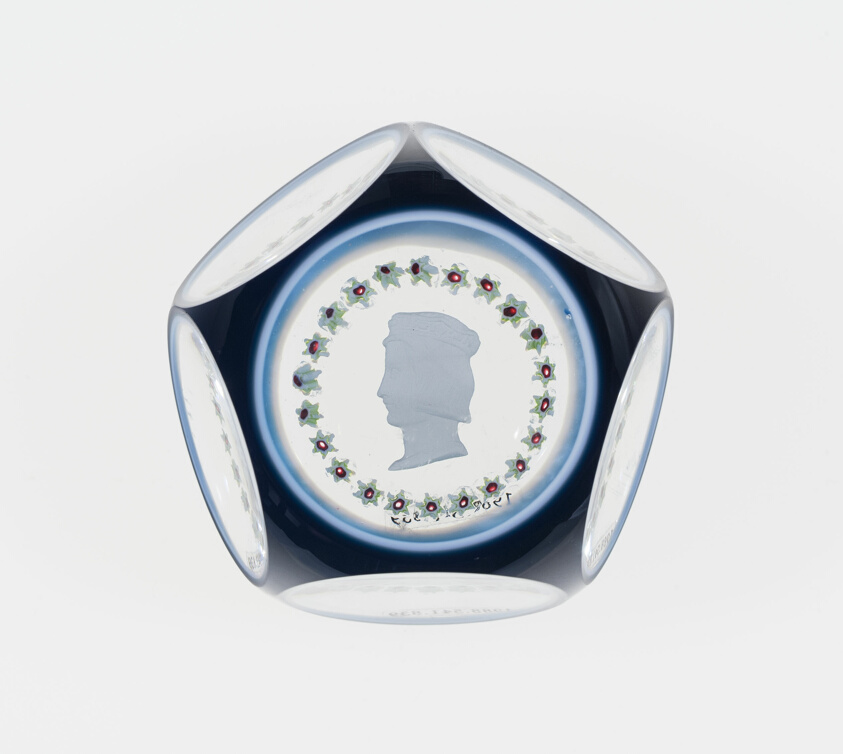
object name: Glass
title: Paperweight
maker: Saint-Louis Glassworks (Cristalleries de Saint-Louis); Lorraine, France, founded 1586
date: Mid 19th century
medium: Glass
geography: Saint-Louis-lès-Bitche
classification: paperweight; glass